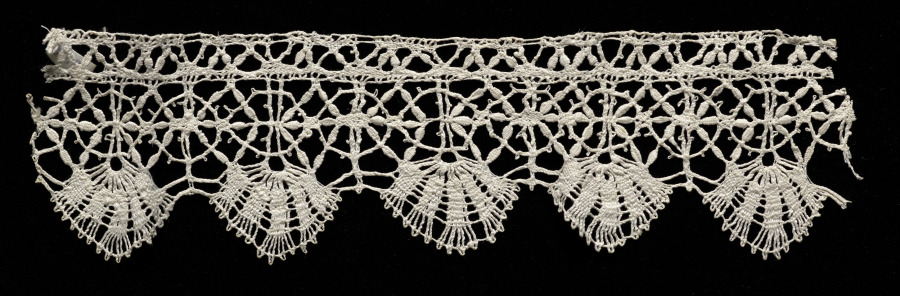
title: Lace Insertion with Edging of Bell Points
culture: Italy, Genoa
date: 1700s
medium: Bobbin lace (rose lace)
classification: Lace